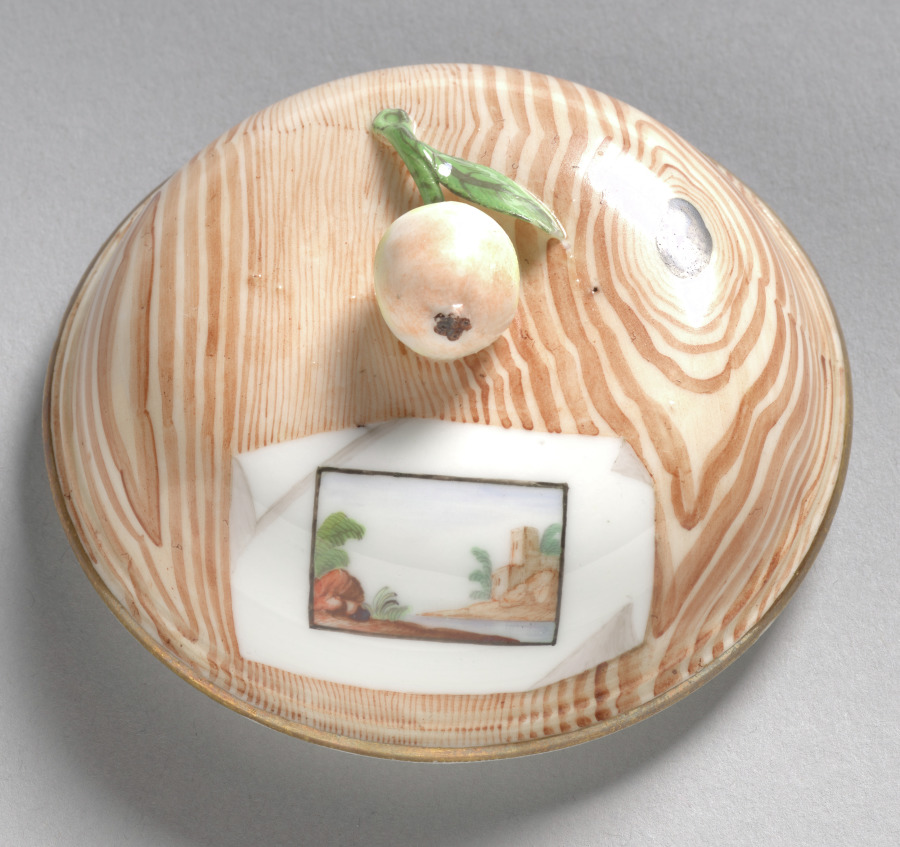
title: Cover for a Bowl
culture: France, 18th century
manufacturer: Niderviller Factory (French)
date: c. 1780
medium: porcelain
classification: Ceramic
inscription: inscribed at lower right corner of two trompe l'oeil prints: Niderviller.